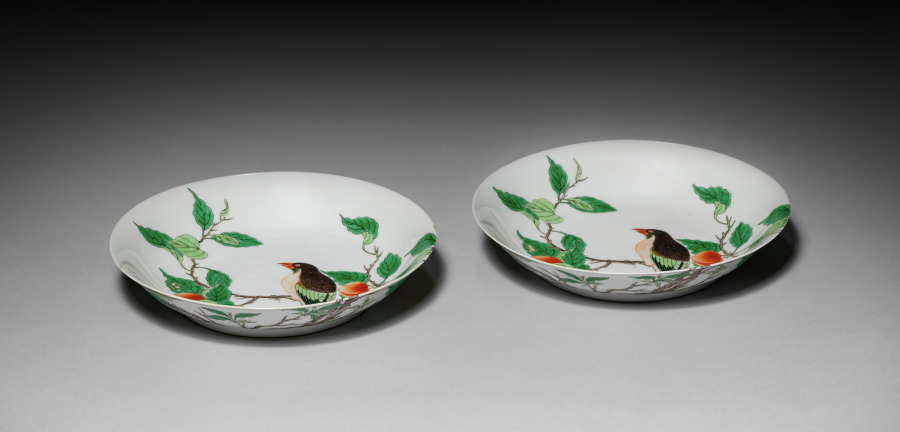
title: Dish with Bird on Fruit Tree Branch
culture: China, Jiangxi province, Jingdezhen kilns, Qing dynasty (1644–1911), Kangxi mark and reign (1662–1722)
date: 1662–1722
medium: Porcelain with famille-verte overglaze enamel decoration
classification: Ceramic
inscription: 大清康熙年制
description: A green-winged, red-billed bird perches on a fruit tree branch. The dish is painted in bright enamels and fine outlines to create vibrant tones and delicate textures, especially visible in the bird’s feathers. The plant motif extends beyond the rim in what is known as an “over-the-wall” composition. While decorative, the composition and color scheme remain stylized rather than naturalistic. The existence of several Kangxi period dishes with an almost identical design suggests that the composition followed standardized templates, likely intended for festive occasions or as a gift.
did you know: This dish is related to the set created for the Kangxi emperor's 60th birthday.